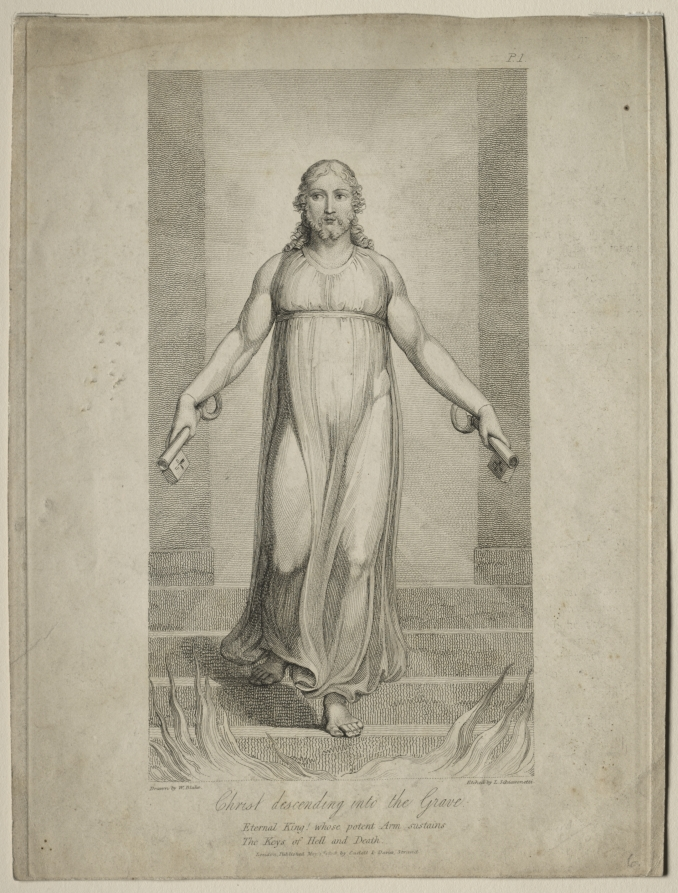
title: Christ Descending into the Grave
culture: Italy, 18th century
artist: Luigi Schiavonetti (Italian, 1765–1810)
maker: after William Blake (British, 1757–1827)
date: 1808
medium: etching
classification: Print